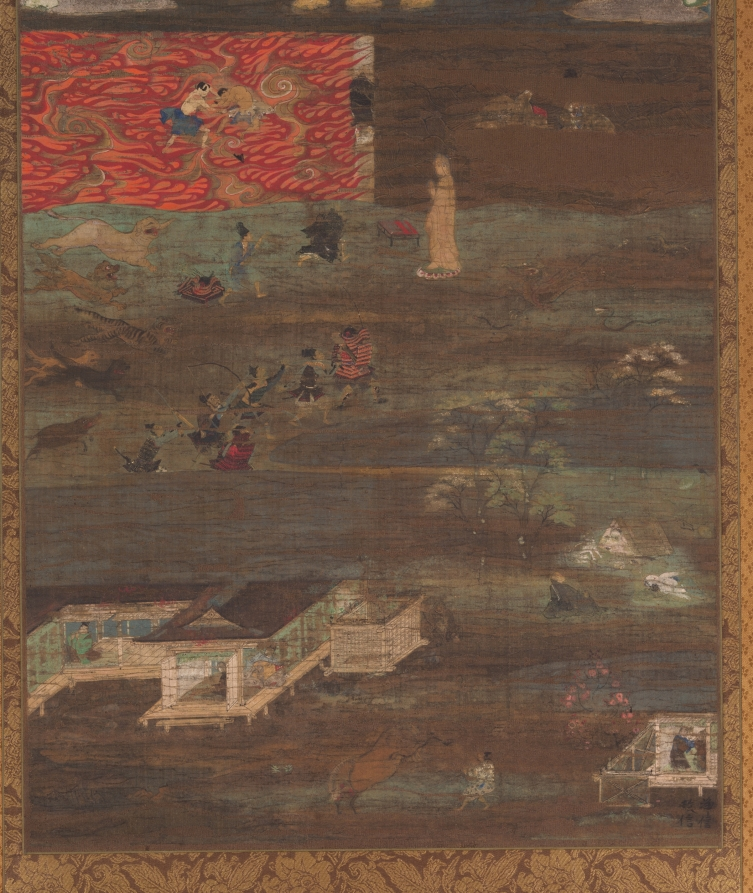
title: The White Path Between Two Rivers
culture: Japan, Kamakura period (1185–1333)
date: 1200s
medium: hanging scroll; ink, color, gold, silver, and cut gold on silk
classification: Painting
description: This painting is a visual presentation of a teaching ascribed to the Chinese Buddhist monk Shandao (善導) (613–681). It describes a challenging journey to the land of the Buddha Amida along a narrow path between a river of fire and a river of water. The story is about escaping the six paths of reincarnation—the heavens and hells, as well as the realms of humans, animals, hungry ghosts, and fierce beings. The Buddha Amida appears at the top in his Pure Land, or Western Paradise.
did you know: The Six Realms of Transmigration are the: heavenly realm, hells, human realm, animal realm, realm of hungry ghosts, and realm of fierce beings.